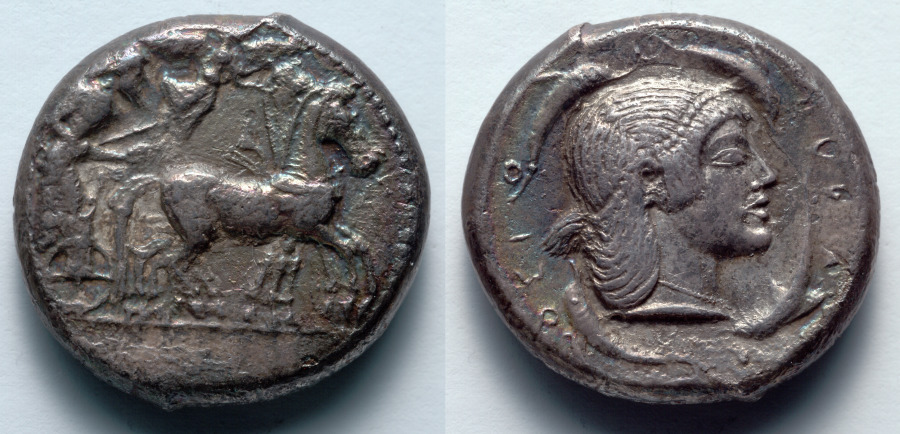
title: Tetradrachm: Quadriga (obverse); Head of Artemis/Arethousa (reverse)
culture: Greek, minted at Syracuse (Sicily)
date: 485–478 BCE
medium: silver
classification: Coins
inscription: [ΣΥΡΑΚ] - ΟΣΙΟ[Ν]